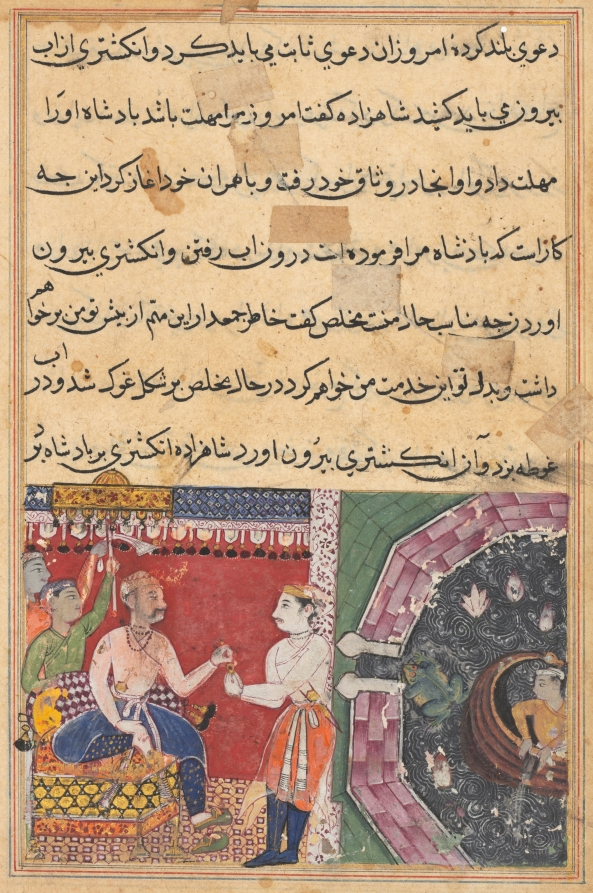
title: The prince, with the help of Mukhlis who changes into a frog, recovers the ring lost in the sea, and returns it to the king, from a Tuti-nama (Tales of a Parrot): Eighteenth Night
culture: Mughal India, court of Akbar (reigned 1556–1605)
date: c. 1560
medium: gum tempera, ink, and gold on paper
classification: Painting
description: The prince arrived at a royal capital, where he pledged to assist the local king in any tasks. One day, when fishing at sea, the king dropped a precious ring into the water. The prince asked his servant, the frog, to retrieve it. At the left, the prince respectfully returns the ring to the king on his throne. The frog is at the entrance of the walled harbor to the sea, where a boatman bails water. Lotus flowers have been painted among the swirling eddies.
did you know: The sea where the king dropped his ring is represented here as a walled pool.